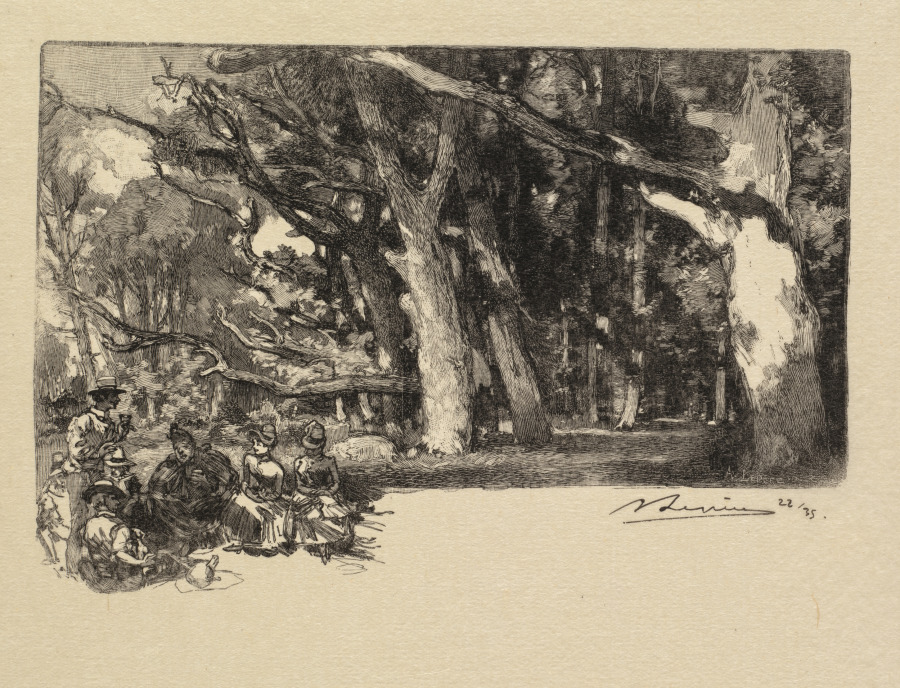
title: Fontainebleau Forest: Noon under the Trees (La Forêt de Fontainebleau: Midi sous bois)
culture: France, 19th century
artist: Auguste Louis Lepère (French, 1849–1918)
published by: A. Desmoulins, Published in Revue Illustrée, 1887–90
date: 1890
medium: wood engraving from bound volume of 34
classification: Bound Volume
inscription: In block, lower right: A, Lepère del. sc; below image, lower right, in black ink: ALepère 22/35; on window mat, lower right, in graphite: Midi sous bois